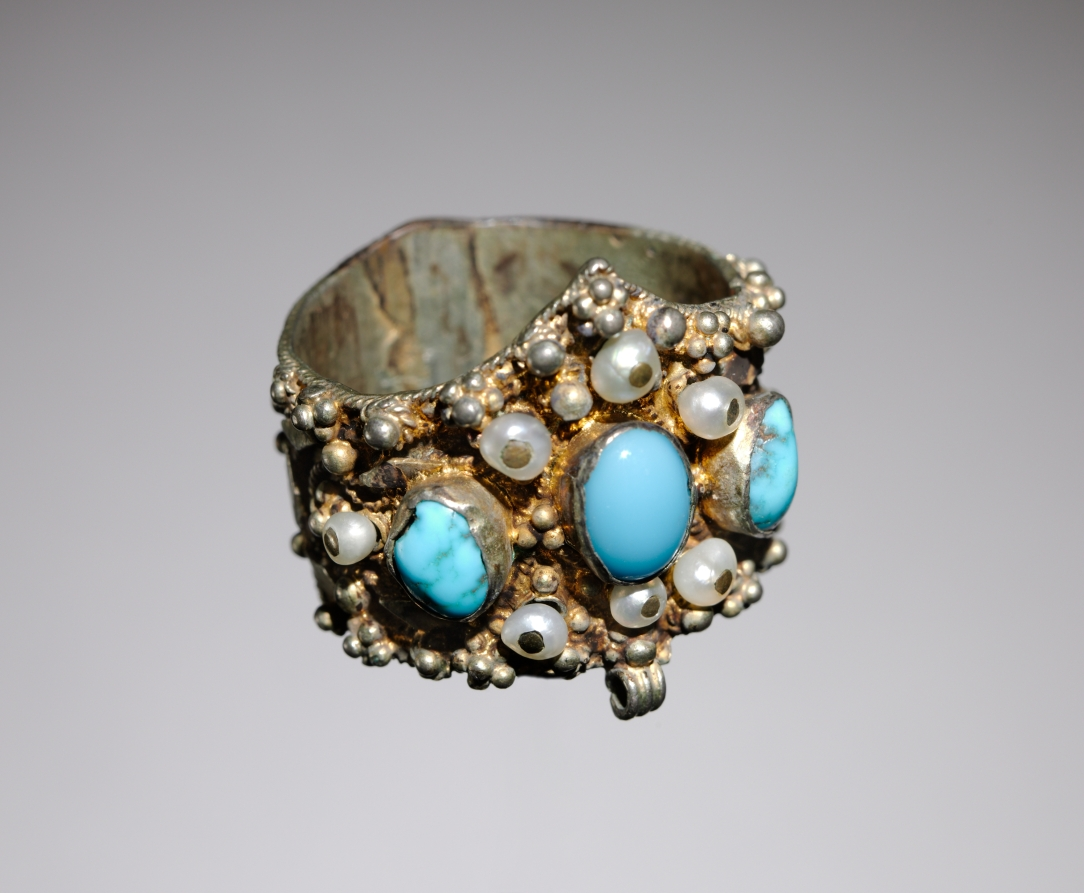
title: Ring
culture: North Africa, 19th century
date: 1800s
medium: Silver gilding, turquoise, and pearls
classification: Jewelry